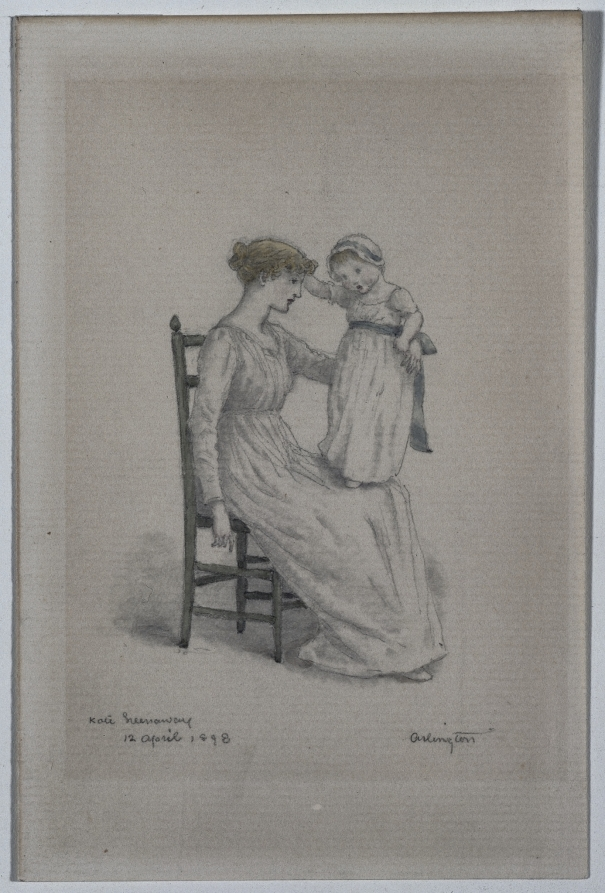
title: Mother and Child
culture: England, 19th century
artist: Kate Greenaway (British, 1846–1901)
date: 1898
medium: graphite and watercolor on paper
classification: Drawing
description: This tender moment between a mother and her child is characteristic of Kate Greenaway’s idealized images of childhood. Working in the late 1800s, Greenaway depicted clothing vaguely inspired by the fashion of the early 1800s, suggesting that the image was from a moment in an idealized past when things were simpler and happier. Greenaway was one of the most successful female illustrators of her time. Her illustrations were used not only in children’s books but also in a variety of consumer products, including calendars, address books, plates, and textiles, and even influenced children’s fashion.